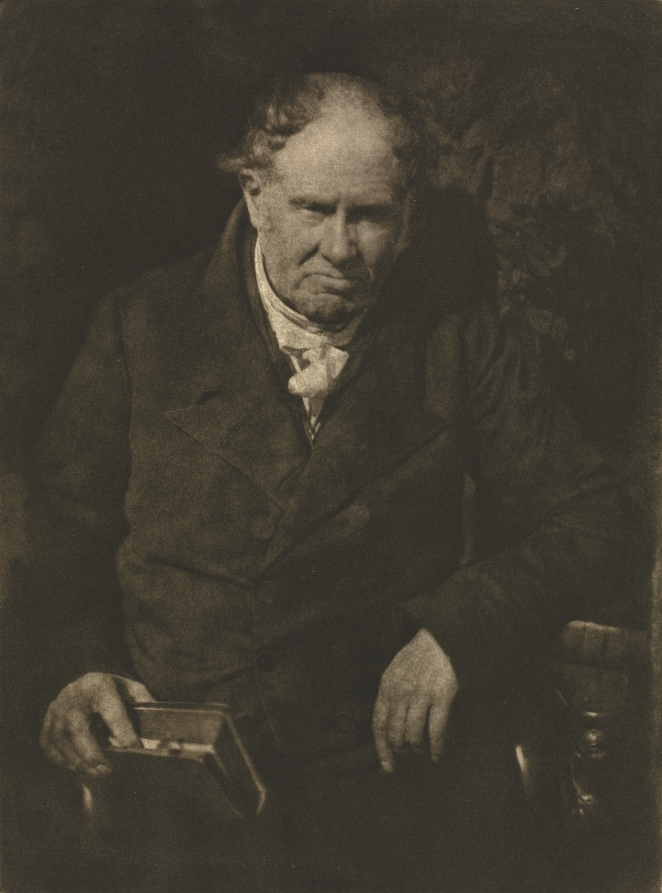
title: Camera Work: Dr. Munro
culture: England, 20th century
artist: David Octavius Hill (British, 1802–1870)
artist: and Robert Adamson (British, 1821–1848)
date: 1905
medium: photogravure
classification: Bound Volume